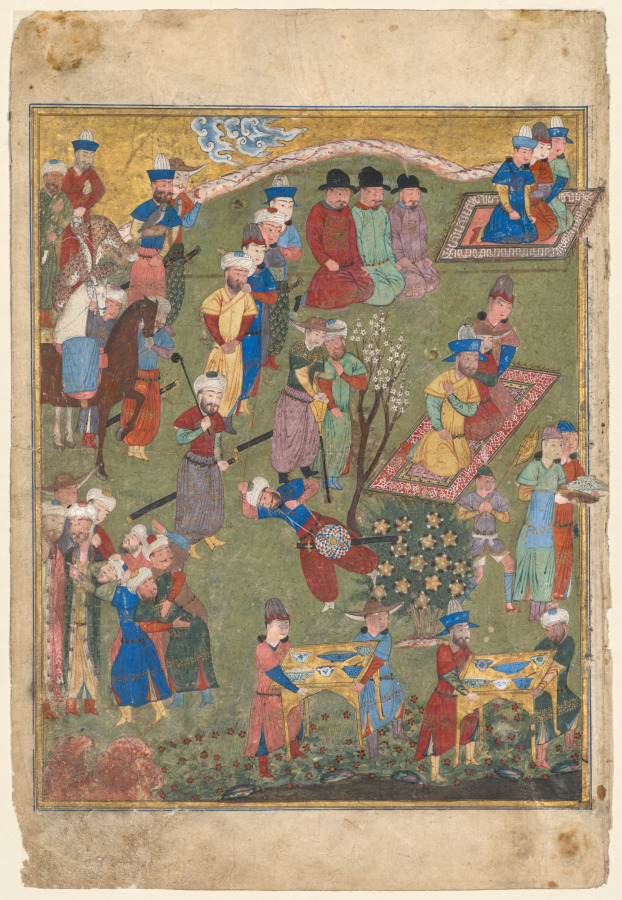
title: Royal Reception in a Landscape, left folio from the double frontispiece of a Shahnama (Book of Kings) of Firdausi (Persian, about 940–1019 or 1025)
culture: Iran, Shiraz, Timurid period (1370-1501)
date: 1444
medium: Opaque watercolor, ink, gold, and silver on paper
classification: Manuscript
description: The royal feast is set in a green landscape dotted with flowers and blossoming bushes against a gold sky with wisps of blue and white clouds. The group of figures in the upper left includes a falconer, horses, attendants, and two hunting cheetahs, while servers transport food and drink in gold and ceramic vessels, some presumably Chinese blue and white porcelain. Possibly this banquet was offered after a courtly hunt, a prestigious symbol of power and wealth. Among the groups of men sitting on elaborate carpets are three Chinese officials, identifiable by their black hats, kneeling together on the ground. Although their presence indicates the presence of foreign cultures within the Timurid court, the painting also reveals that not all are welcome to the feast; in the bottom half of the page a guard wields a stick to drive a group of men out of the garden.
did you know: The painting on this folio is the first half of a double-page frontispiece now detached from a Shahnama (Book of Kings) manuscript. CMA 1956.10 is the left half of the frontispiece.